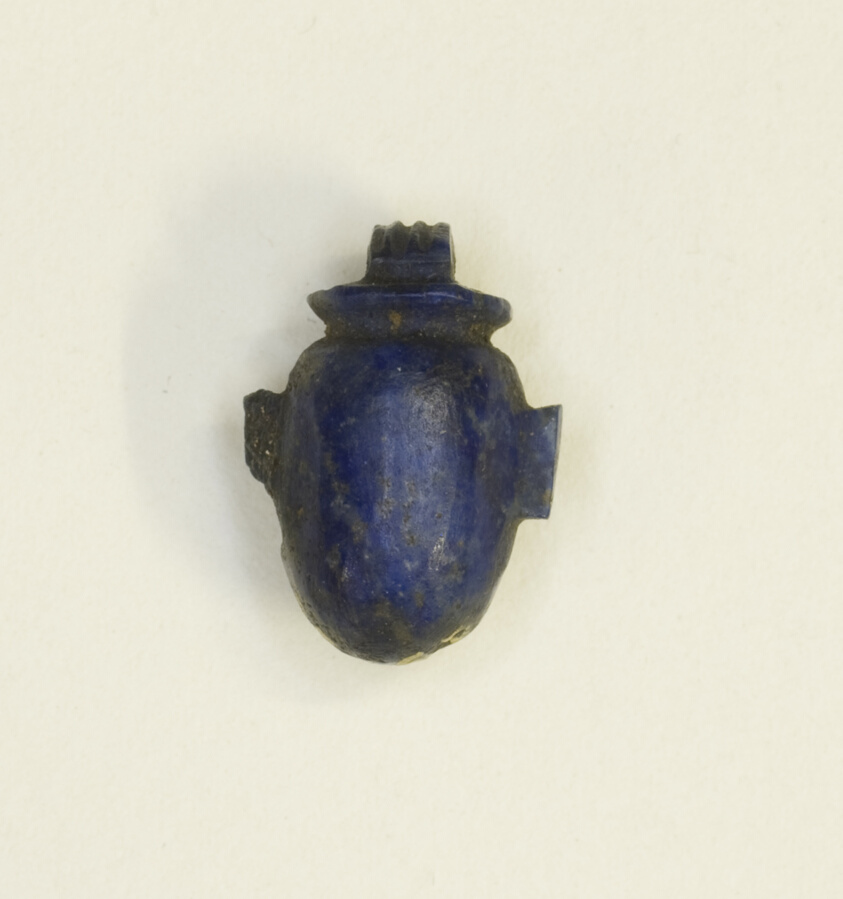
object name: Costume and Accessories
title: Amulet of a Heart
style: third intermediate period, egyptian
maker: Egyptian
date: Third Intermediate Period, Dynasty 21–25 (1070–656 BCE)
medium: Lapis Lazuli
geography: Egypt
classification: amulet; jewelry; bead; ancient art; costume